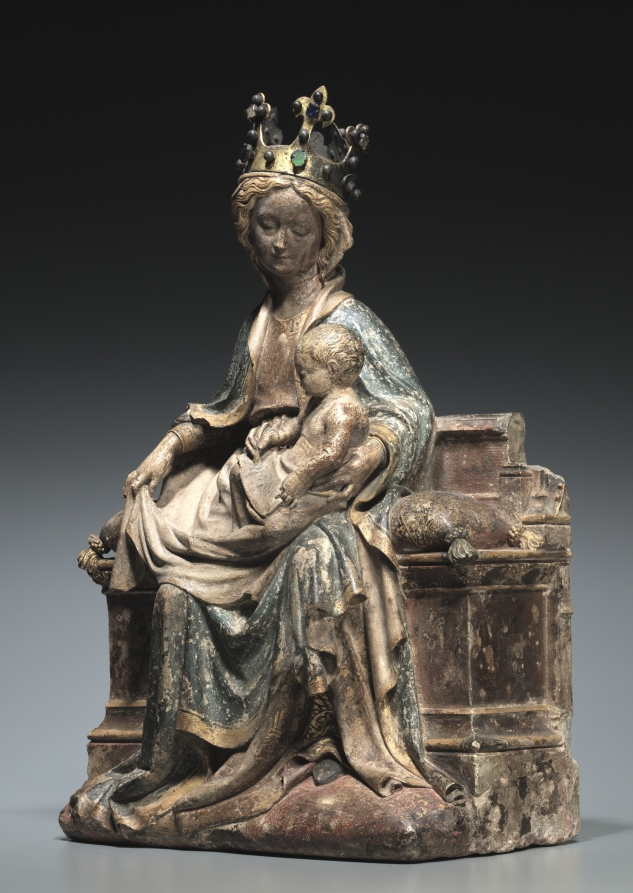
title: Enthroned Virgin with the Writing Christ Child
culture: Franco-Netherlandish, active Paris(?), 15th century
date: c. 1400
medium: limestone with polychromy and gilding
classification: Sculpture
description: This sculpture belongs to a tradition of seated Virgins that were prominent in Netherlandish art in the decades around 1400, and by extension may be associated with the Valois courts at Paris, Dijon, and Bourges. The theme of the Christ child who writes into an open book or onto a vellum banderole emerged during the third quarter of the 14th century and had great appeal among ecclesiastical and aristocratic clients. It undoubtedly refers to the educating and nurturing role of the mother in teaching the child, but also to the future position of the adult Christ as author and teacher. The small scale of this sculpture and the fact that its back is uncarved suggest that it was made for a small alcove or niche, appropriate in the intimate setting of a small chapel or oratory. The sculpture would have primarily been viewed from the front and perhaps from slightly below.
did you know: Here the Virgin is sitting on a highly decorated pillow.